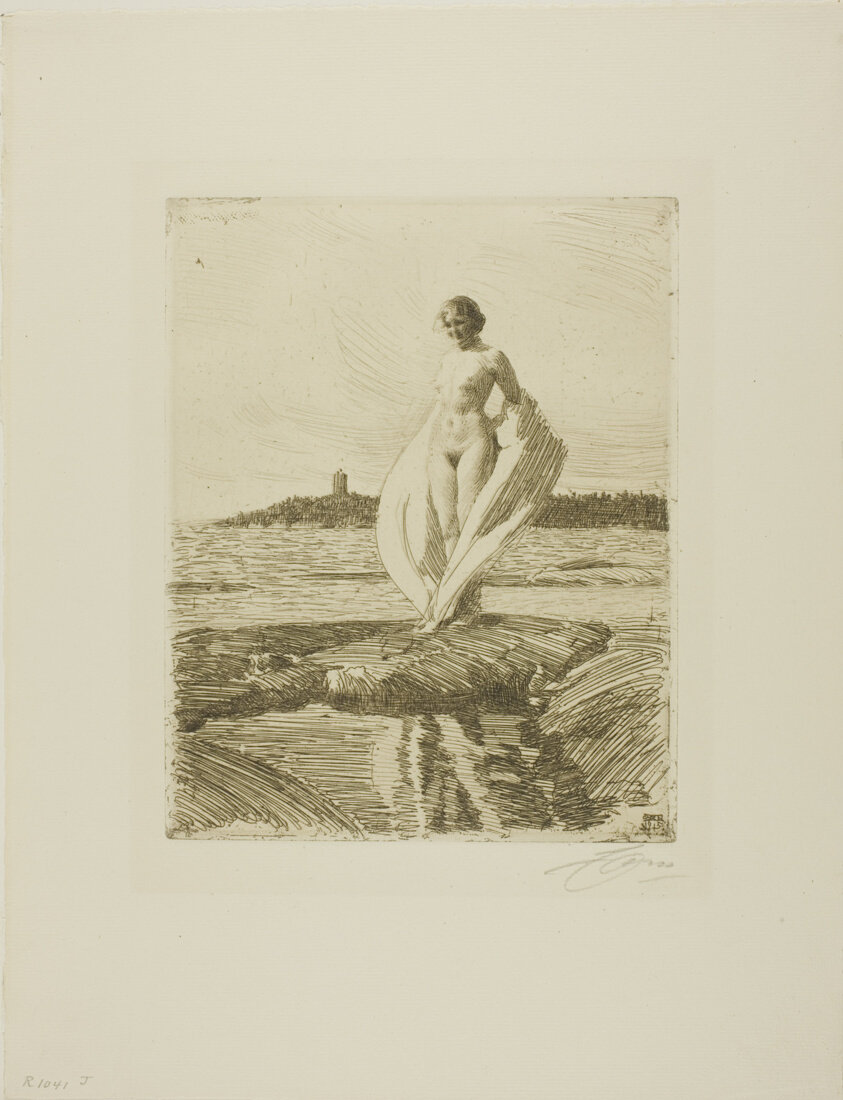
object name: Print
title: The Swan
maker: Anders Zorn (Swedish, 1860-1920)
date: 1915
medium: Etching on ivory laid paper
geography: Sweden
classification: etching; print; prints and drawing